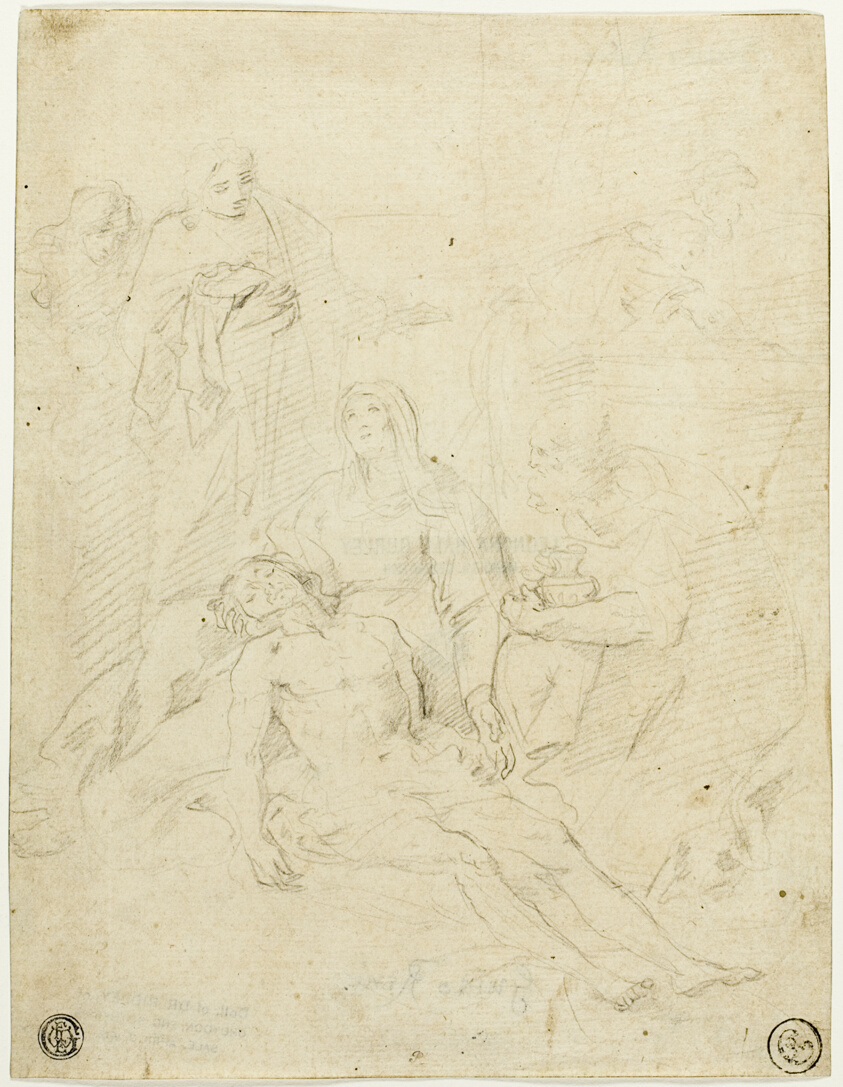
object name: Drawing and Watercolor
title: Pieta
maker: School of Simone Cantarini; Italian, 1612-1648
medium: Black chalk on cream laid paper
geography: Italy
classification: graphite; drawings (visual works); prints and drawing